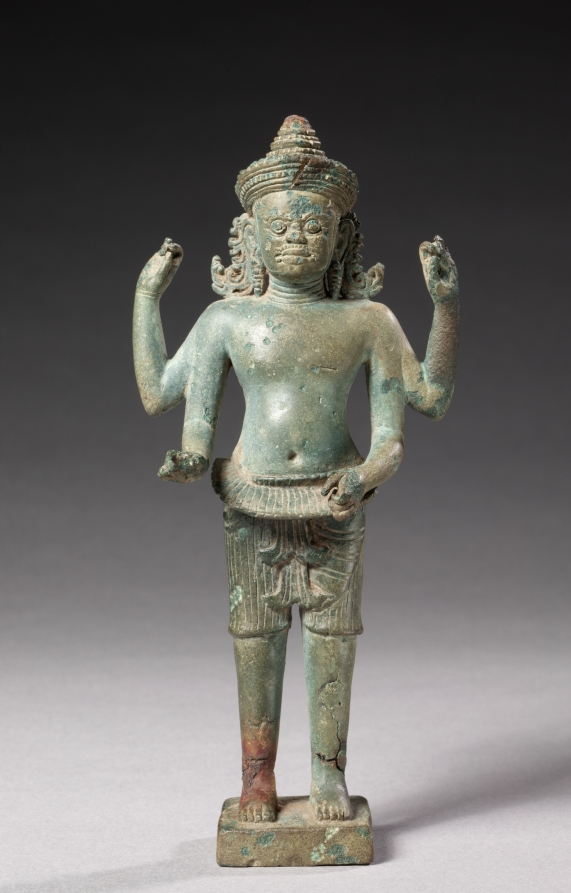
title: Standing Ashura with Four Arms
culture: Cambodia, Koh Ker style, 2nd quarter of 10th Century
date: 925–950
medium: bronze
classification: Sculpture